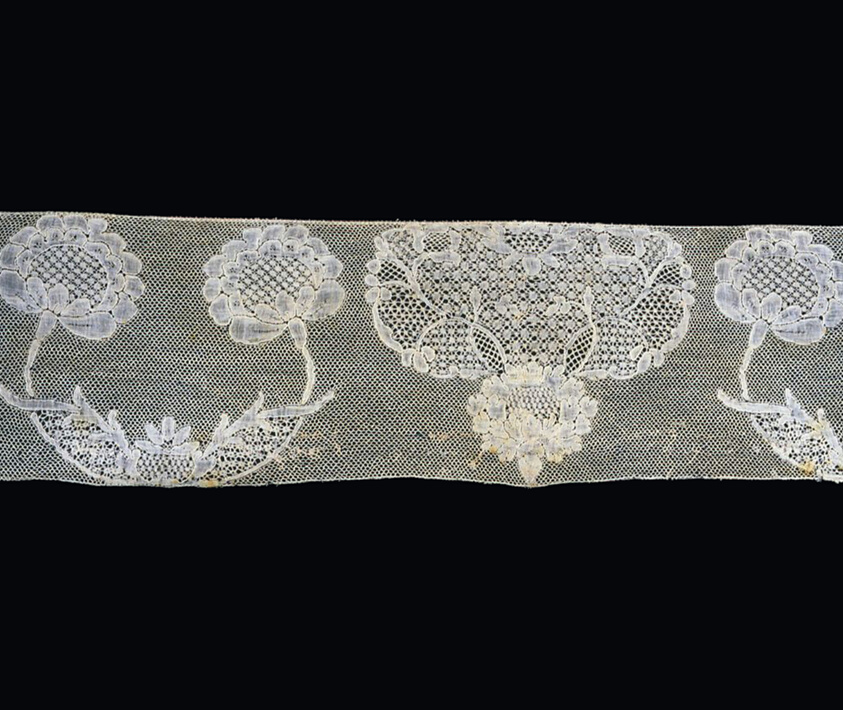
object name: Textile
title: Border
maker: Flanders or France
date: 1775/1800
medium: Linen, bobbin straight lace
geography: Flanders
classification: textile; lace - bobbin